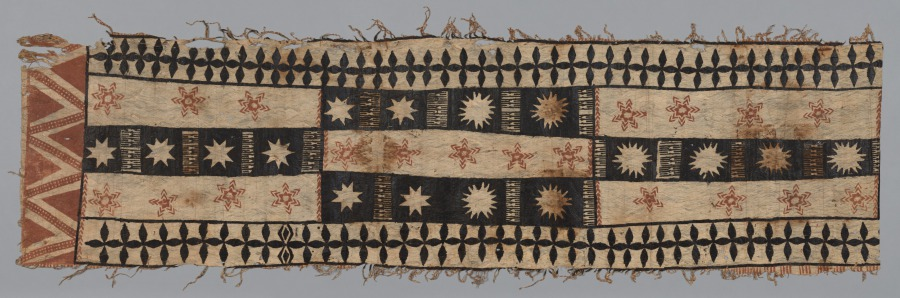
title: Tapa Cloth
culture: Oceania, Melanesia, Fiji Islands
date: Before 1971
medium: mulberry bark (Broussonetia papyrifera)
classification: Textile